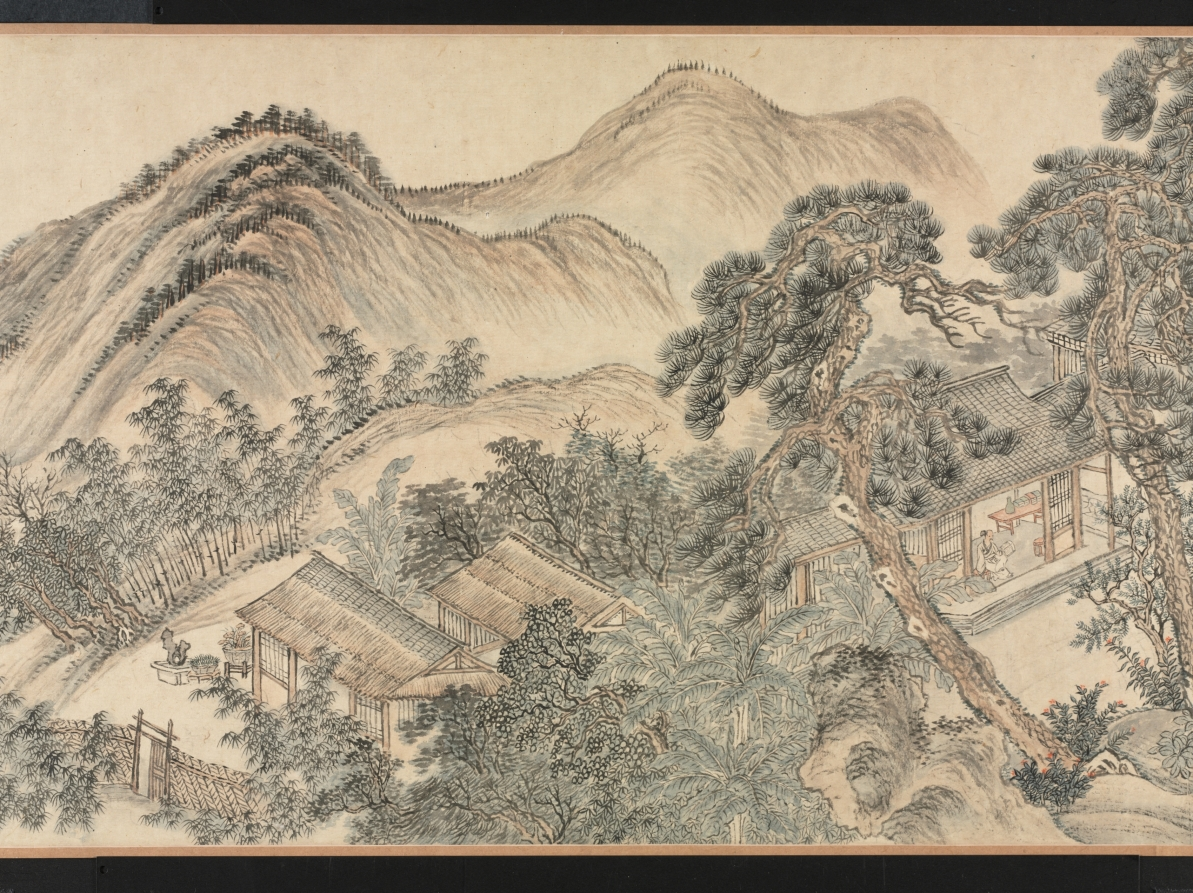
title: Hall of Lofty Pines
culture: China, Qing dynasty (1644-1911)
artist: Wang Hui (Chinese, 1632–1717)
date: 1703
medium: handscroll; ink and color on paper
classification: Painting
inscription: [題] 松喬堂圖 康熙癸未夏六月, 海虞耕煙散人王翬畫。[印]王翬之印; 石谷. [左下] 來青閣; 耕煙野老時年七十有二.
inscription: 松喬堂圖一卷，海虞石谷王君為靜海近公厲少司冦公作也。圖成于癸未之夏。未幾而公遂仙去。公令子今編修君南湖屬余題跋其後。余與公同官侍從，交契最深。側見公之清修純德，蔚為聖天子所眷重。侍直內廷，密勿贊襄，幾二十餘年。蒼生之所以受賜，士林之所以沐德者，天下莫能窺，在廷莫能悉。而公卒不言。以故宸衷日益契，恩禮亦日益渥。雖年逾懸車，時有歸老之念。而上固不聼公之去。其所謂松喬堂者，御書以賜公者也。蓋以松比公之清風勁節，而歲寒不改，經霜彌茂。則又以期公之壽考未有艾焉。公知此身未易乞，而山林槃磵之樂，止可寄諸寤思。此松喬堂圖之所由作也歟。石谷此圖，結構精密，筆墨超邁。其寫樹木之蒼蔚，堂宇之靚幽。恍見摩詰輞川樂天廬山之勝。獨惜公未得一日徜徉故園以償其願。即繪於圖亦未得以永其趣，此編修君之所以眷眷不忘也。雖然千歳之松喬，下蔭百畝，上以修棟梁之需。然則上當日名堂之意，不更望於後之人襲其芘而養其材也哉。吾願編修君之寶斯圖。并望君之塗塈丹雘，大其堂構也已矣。 康熈丙戍重陽三日，雲間王鴻緒跋。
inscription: 10 additional seals: 1 seal of Li Duna 勵杜納 (1628–1703); 4 seals of Zha Ying 查瑩 (jinshi of 1766); 5 seals of Li Yun (dates unknown).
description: Wang Hui 王翬, a leading painter in the orthodox school of the early Qing dynasty (1644–1911), was commissioned to paint this landscape with a country estate for Li Duna 勵杜納 (1628–1703), vice minister of justice in Emperor Kangxi’s court. The emperor had honored Li by granting him a piece of calligraphy with the name of Li’s retirement retreat, “Hall of Lofty Pines.” He drew a comparison between pines and Li’s upright character, resilience, and longevity. Wang Hui’s painting was supposed to allow Li to imagine living in a beautiful, secluded compound among the hills and pines. Sadly, Li died before seeing the completed painting and before receiving the emperor’s permission to retire. The landscape begins with peaceful riverbanks and low hills. The pines around the estate in the middle of the handscroll are truly lofty, some stretching even beyond the frame of the painting. Li Duna, the estate’s owner, is shown twice in his serene mountain retreat: first approaching the entrance to the compound with two servants at the right, and then later in the scroll, to the left, reading in the comfort of an inner room.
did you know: One servant carries the estate owner's carefully wrapped qin, a type of zither.